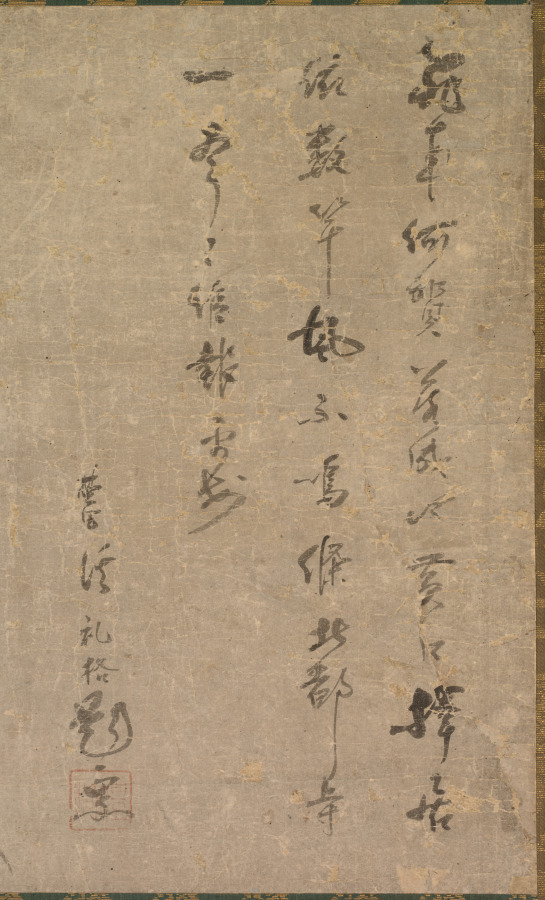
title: Sparrows and Bamboo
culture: Japan, Muromachi period (1392–1573)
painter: Shiken Saidō (Japanese, 1486–1581)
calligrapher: calligraphy by Ekkei Reikaku (Japanese, d. 1609)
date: mid- to late 1500s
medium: hanging scroll; ink on paper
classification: Painting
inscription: signed: Ekkei Reikaku daishi owaru inscription sealed: Reikaku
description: Shiken Saidō, whose style name was Ze'an, was a Zen monk who trained at Shōkokuji temple in Kyoto, and designed the garden of Reiun’in at Myōshinji temple. He painted landscapes in the style of painter and art advisor to the shogun, Sōami (died 1525), as well as bird-and-flower compositions. A poetic inscription by the monk Ekkei Reikaku accompanies this gentle composition of two sparrows perched on bamboo.